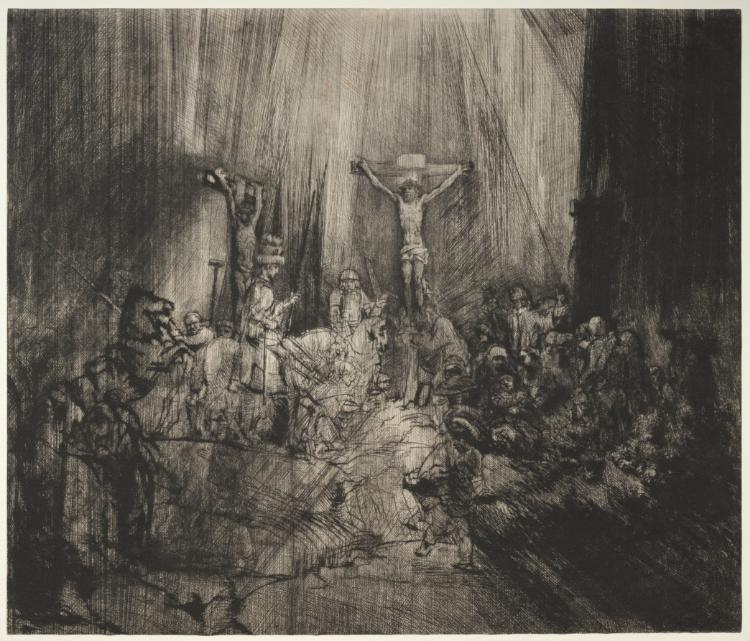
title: Christ Crucified Between the Two Thieves: 'The Three Crosses'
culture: Rembrandt, 17th century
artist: Rembrandt van Rijn (Dutch, 1606–1669)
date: 1653-c.1660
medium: drypoint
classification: Print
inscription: VERSO, lower left, in graphite: 301 C ; lower left, in graphite: 21805 ; lower left, in graphite: [?]35 ; lower left, in pen and brown ink: #[turned 45% with dots top, bottom, and at the two sides] ://:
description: Rembrandt’s Christ Crucified Between the Two Thieves is executed entirely in drypoint. Because of the delicacy of the technique, the copper plate was worn after the artist printed about 40 impressions of the first three states. In order to continue using the plate, Rembrandt reworked it, changing the image somewhat. In this fourth state, slashing strokes obscure the spectators visible in the earlier version, creating a tenebrous setting that focuses attention on Christ bathed in celestial light. Although drypoint is an inherently linear medium, Rembrandt used it to obtain tonal qualities associated with painting. The blackness becomes an active force that threatens to extinguish the light of Christ—a literal illustration of the Evangelist Luke’s description of the event that brought "a darkness over all the earth."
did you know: When he printed this impression, Rembrandt deliberately left ink on the printing plate, specifically on the left and right sides, essentially creating a unique work.